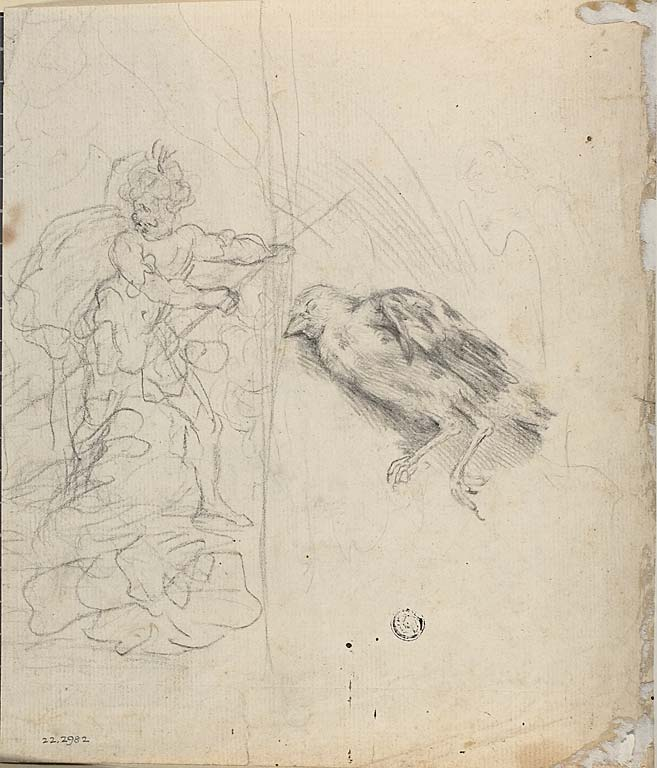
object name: Drawing and Watercolor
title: Five Caricatures of Men (recto); Sketch of Male Figure and Bird (verso)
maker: Follower of Faustino Bocchi (Italian, 1659-1742); or possibly after Faustino Bocchi (Italian, 1659-1742)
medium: Black chalk (recto and verso) on ivory laid paper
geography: Italy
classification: chalk; drawings (visual works); prints and drawing